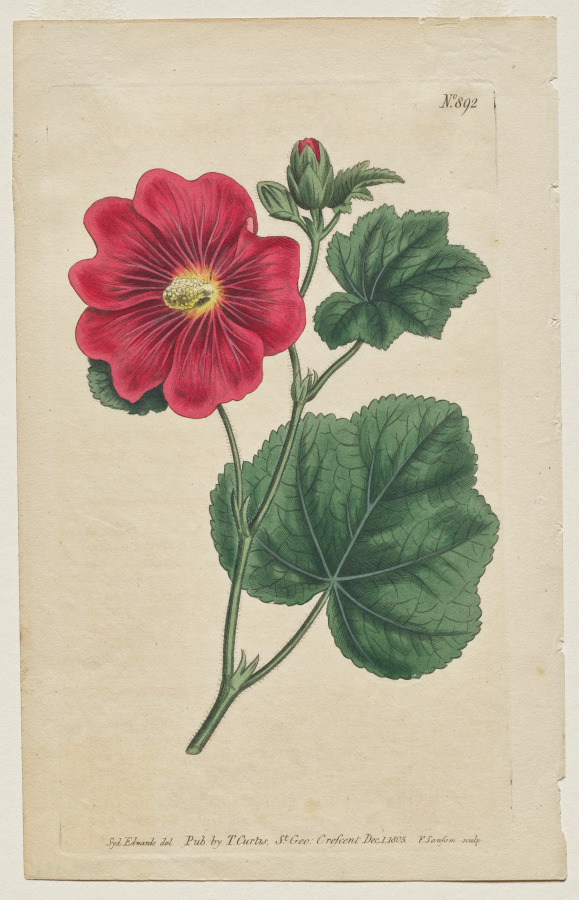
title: The Botanical Magazine or Flower Garden Displayed: Plate 892, Althaea Flexuosa. Seringapatam A Hollyhock . [Althea rosea]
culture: England, 19th century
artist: Francis Sansom (British, 1815)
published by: Thomas Curtis (British, 1846–1920)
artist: after Sydenham Edwards (British, 1768–1819)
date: 1805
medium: engraving with hand coloring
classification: Print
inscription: upper right corner, engraved: No. 892 lower margin, engraved: Syd. Edwards del. Pub. By T. Curtis, St. Geo. Crescent Dec. 1, 1805 F. Sansom sculp.